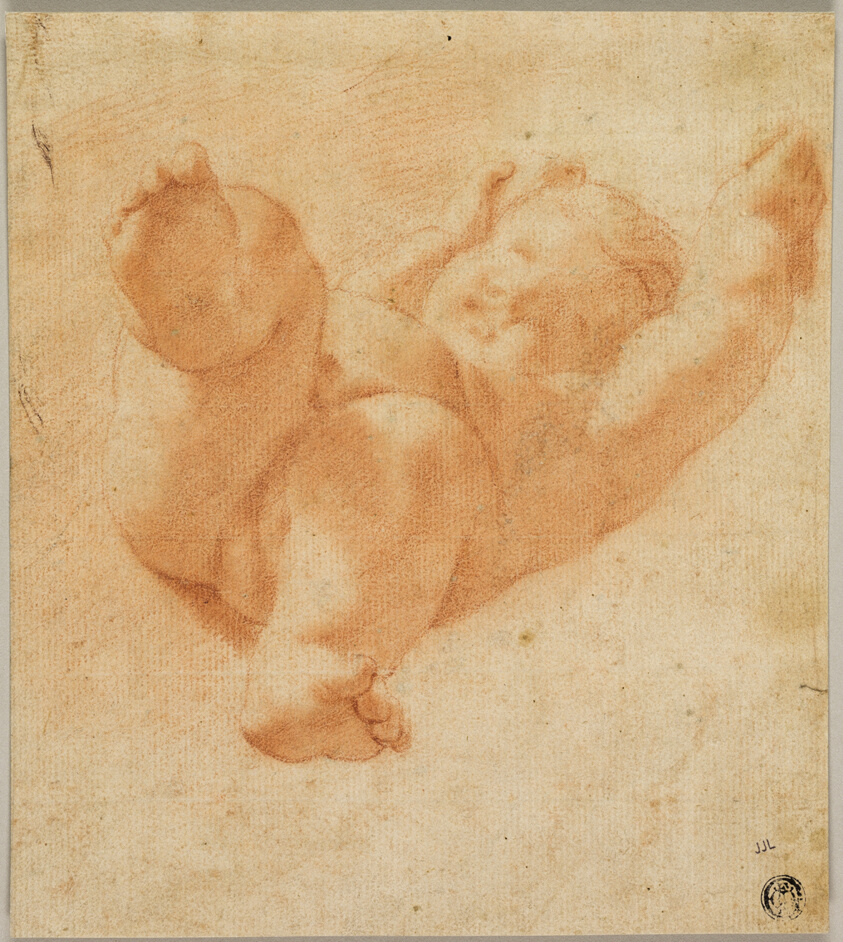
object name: Drawing and Watercolor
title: Foreshortened Putto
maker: After Antonio Allegri, called Correggio; Italian, 1489-1534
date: 1522/30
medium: Red chalk on buff laid paper, laid down on buff laid paper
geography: Italy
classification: chalk; drawings (visual works); prints and drawing